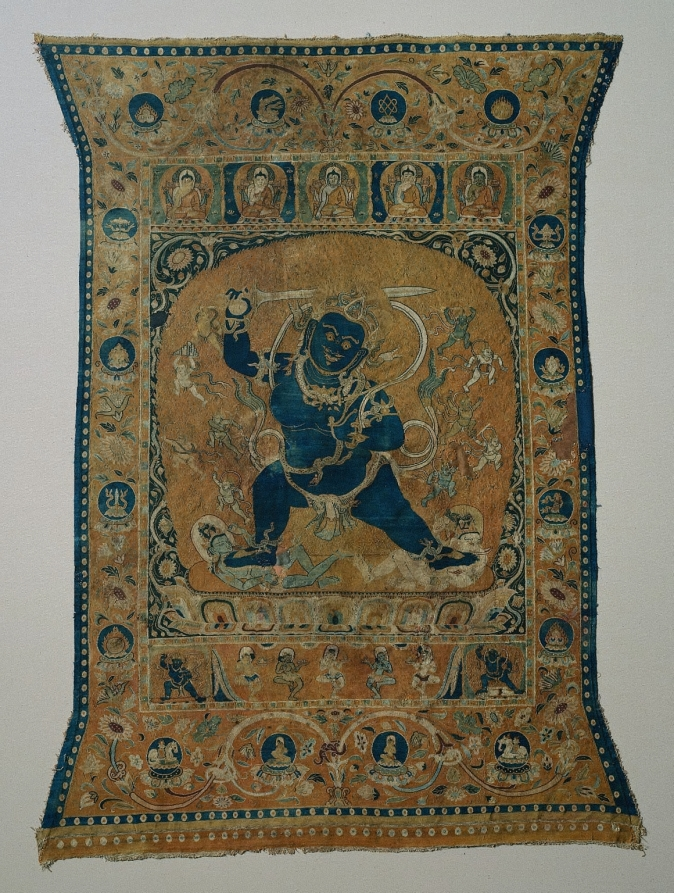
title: Achala, King of the Wrathful Ones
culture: China, Zhejiang Province, probably Hangzhou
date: early 1200s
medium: Thangka, silk tapestry with pearls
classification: Textile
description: The powerful blue body of Achala, meaning “immovable,” dominates the composition. He holds a sword to cut through ignorance and a noose for catching illusions that plague the path to enlightenment. Small personifications of furious destroyers of illusion (maya) emanate from him on either side, each with his own weapon. This image expresses what advanced practitioners would visualize in meditation rituals, as explained in Buddhist texts called tantras. Woven with a sophistication matched only by products of the Hangzhou looms, this devotional tapestry made its way to Khara-Khoto, capital of the Tangut Empire located in present-day Mongolia and Central Asia, where tantric Buddhism was prevalent.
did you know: The elephant-headed figure under his left foot is a demonic divinity, a yaksha, who creates obstacles to enlightenment.